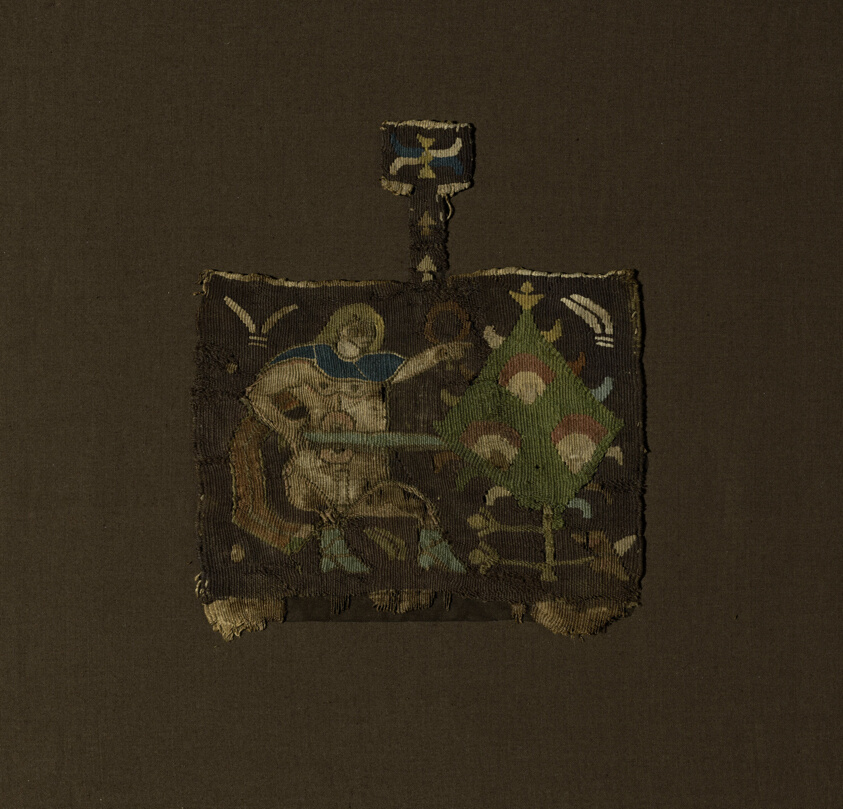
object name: Textile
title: Fragment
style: roman period (egyptian)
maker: Coptic (Egypt)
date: Roman period (30 B.C.– 641 A.D.)/Arab period (641–969), 6th/8th century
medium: Wool and linen, slit and dovetailed tapestry weave with eccentric wefts and wrapped outlining wefts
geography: Egypt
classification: textile; weaving